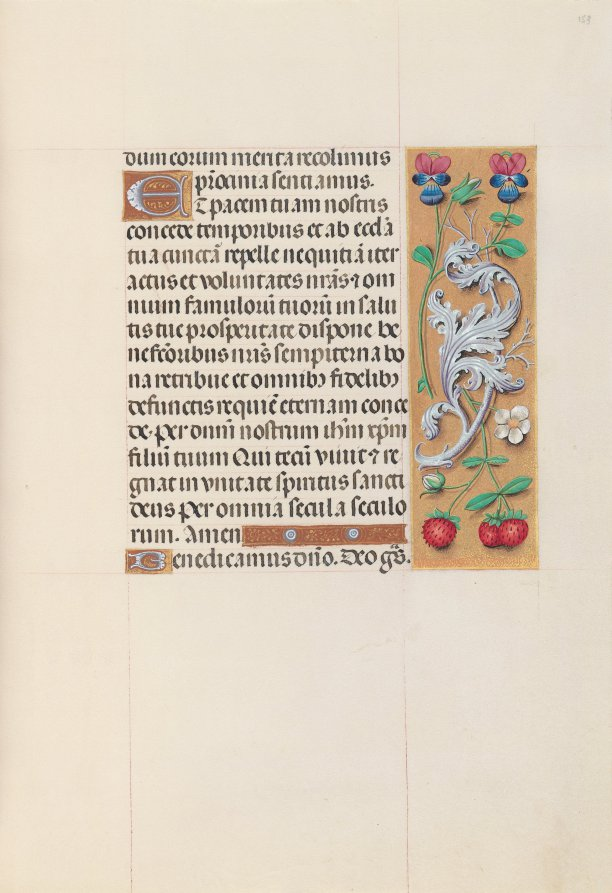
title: Hours of Queen Isabella the Catholic, Queen of Spain: Fol. 153r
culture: Flanders, Ghent and Bruges, late 15th century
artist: Master of the First Prayerbook of Maximillian (Flemish, c. 1444–1519)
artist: and Associates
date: c. 1500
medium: ink, tempera, and gold on vellum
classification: Bound Volume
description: This manuscript was illuminated by a circle of at least five highly organized manuscript painters active in the Flemish cities of Ghent and Bruges. The principal illuminator was Alexander Bening, who painted the majority of the book's miniatures. Manuscripts produced by this circle of artists are renowned for the decoration of their borders, which typically feature a rich variety of realistically-painted flowers, birds, and butterflies. This prayer book, called a book of hours, was intended not for a cleric, but for the private devotions of a lay person-in this case, Isabella the Catholic, Queen of Spain (1451-1504). Isabella's coat of arms embellishes the book's frontispiece. It is unlikely that the book was commissioned by the Queen herself; rather, she probably received it as a diplomatic gift from someone courting her patronage, perhaps Cardinal Francisco Jimenez de Cisneros. A Franciscan friar, Jimenez was dependent upon Isabella for his advancement, first to the post of Queen's confessor in 1492, and then to Archbishop of Toledo in 1495.